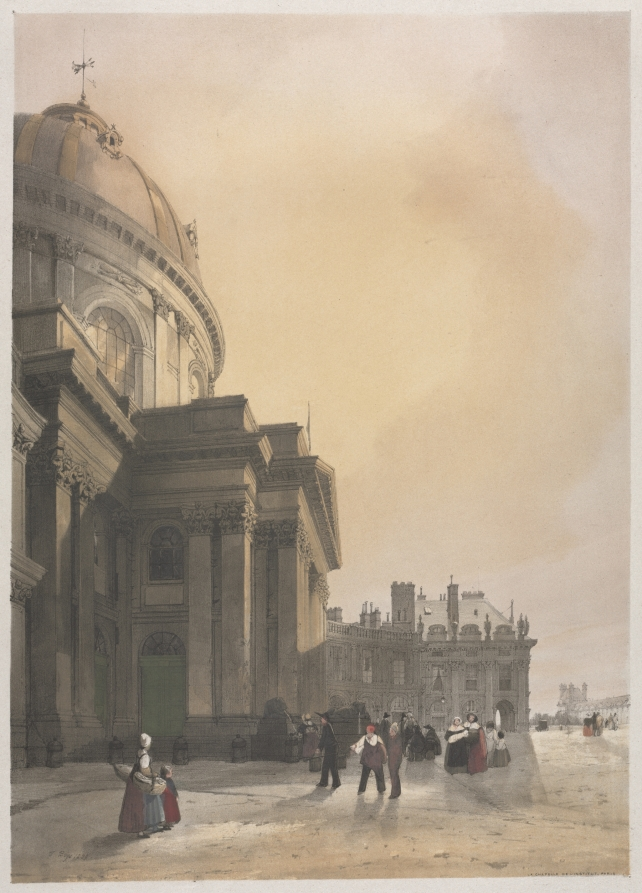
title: Picturesque Architecture in Paris, Ghent, Antwerp, Rouen: La Chapelle de l'Institut, Paris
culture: England, 19th century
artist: Thomas Shotter Boys (British, 1803–1874)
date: 1839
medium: lithograph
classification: Portfolio